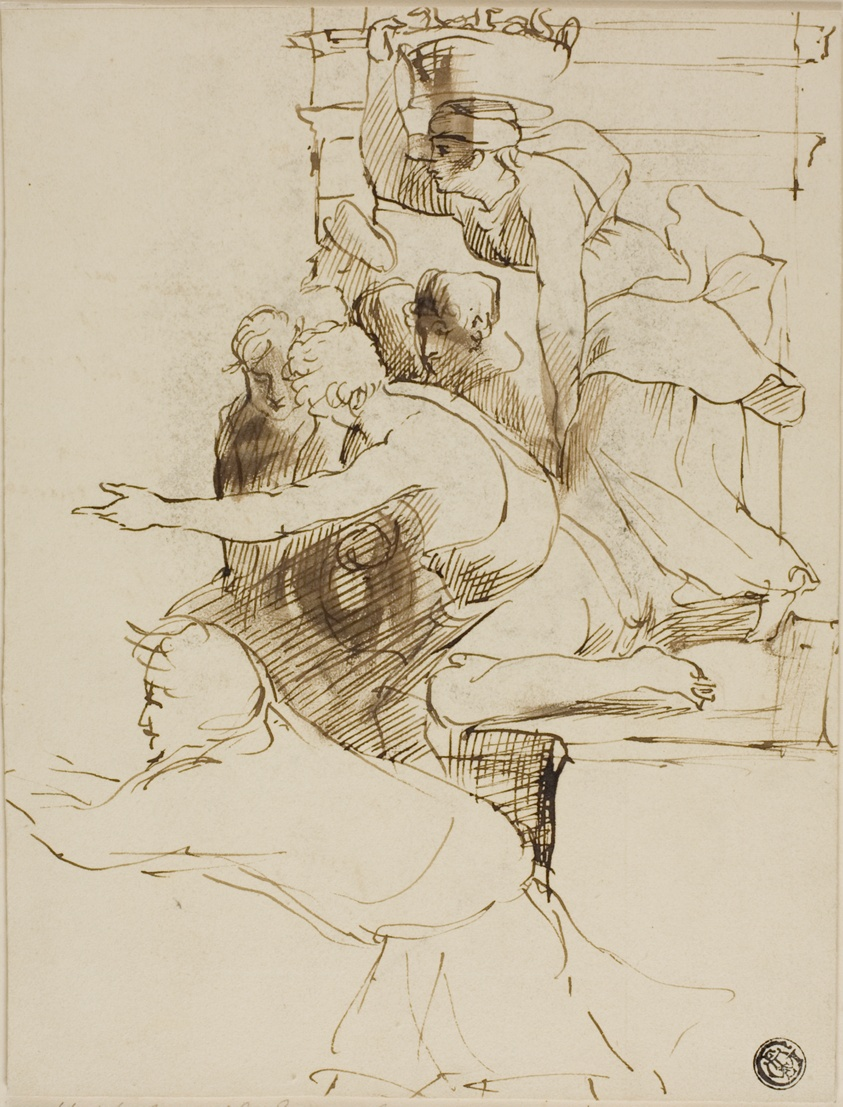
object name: Drawing and Watercolor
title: Sketch from the Escurial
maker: Sir David Wilkie; Scottish, 1785–1841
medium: Pen and brown ink, with brush and brown wash, on cream card, laid down on cream wove paper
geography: Scotland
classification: pen and ink drawings; drawings (visual works); prints and drawing